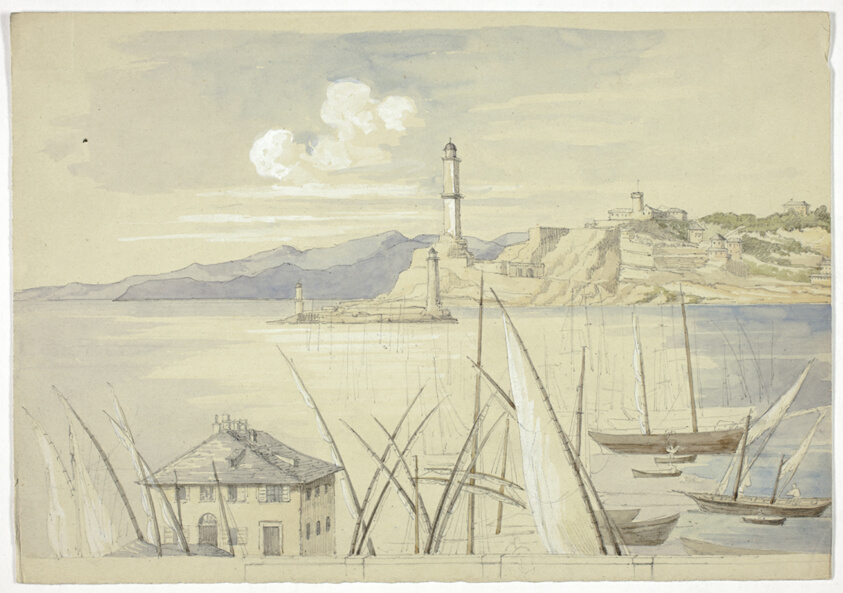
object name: Drawing and Watercolor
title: Genoa from the Croce di Malta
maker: Elizabeth Murray (English, c. 1815-1882)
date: 1841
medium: Watercolor and white gouache over graphite on gray wove paper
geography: England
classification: watercolor; drawings (visual works); prints and drawing